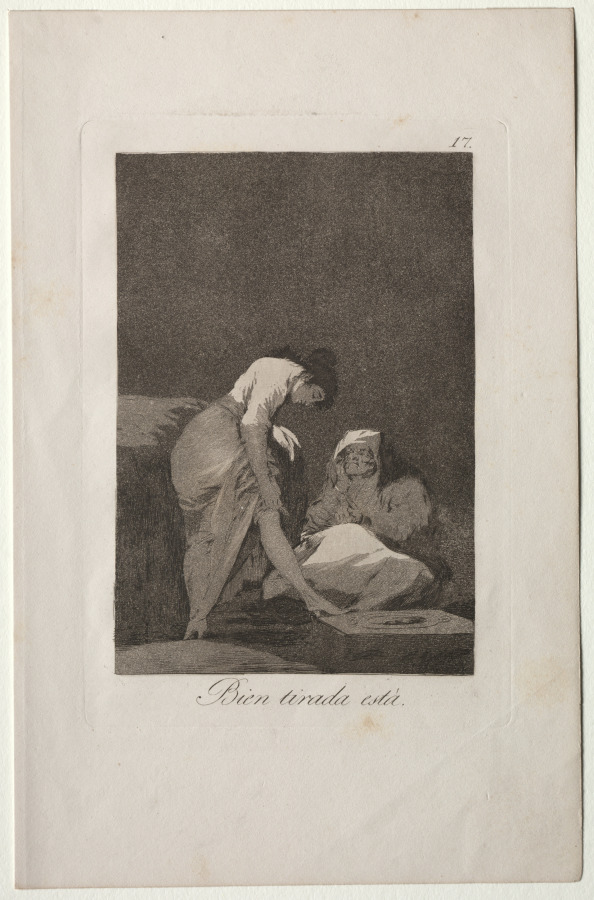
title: It is Nicely Stretched, Plate 17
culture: Spain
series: Los Caprichos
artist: Francisco de Goya (Spanish, 1746–1828)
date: 1799 (printed c. 1855)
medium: etching and aquatint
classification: Print